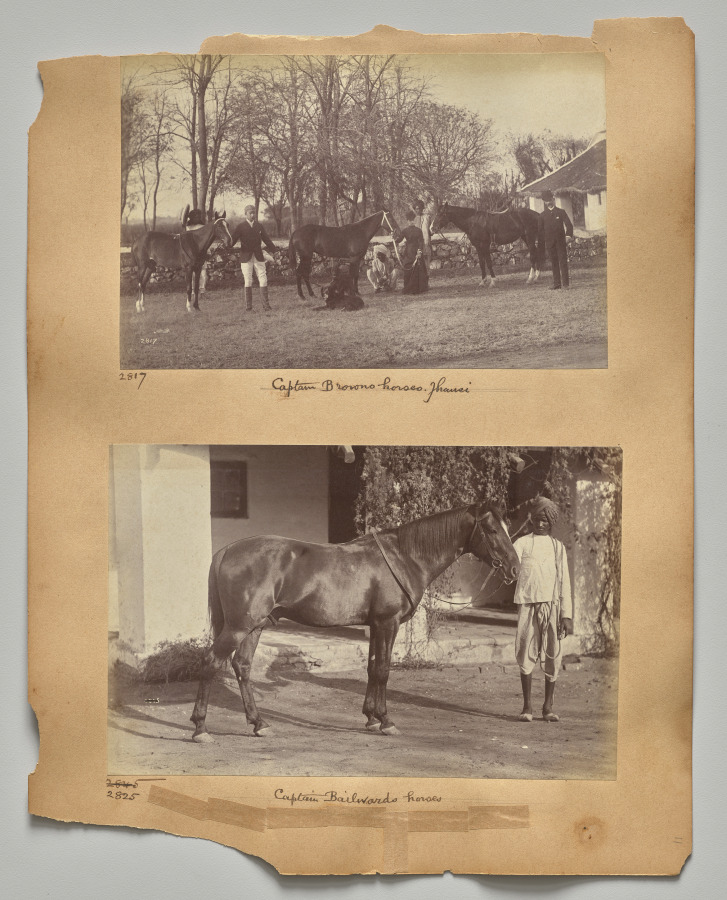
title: Captain Bailward's horses (recto, bottom)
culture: India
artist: Raja Deen Dayal (Indian, 1844–1905)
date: c. 1882–87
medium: albumen print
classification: Photograph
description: These photographs are part of an album, now disassembled, of around 105 photographs taken in India between 1885 and summer 1887 that provide glimpses into the lives of the British colonial elite and royal and upper-class Indians. The museum holds another group of 37 pictures from this album (2016.266), which was probably commissioned by a British civil servant visiting or working in India around 1888 as a personal souvenir of his experiences there.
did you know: Raja Deen Dayal is regarded now, and was considered during his lifetime, to be India’s most important 19th-century photographer.